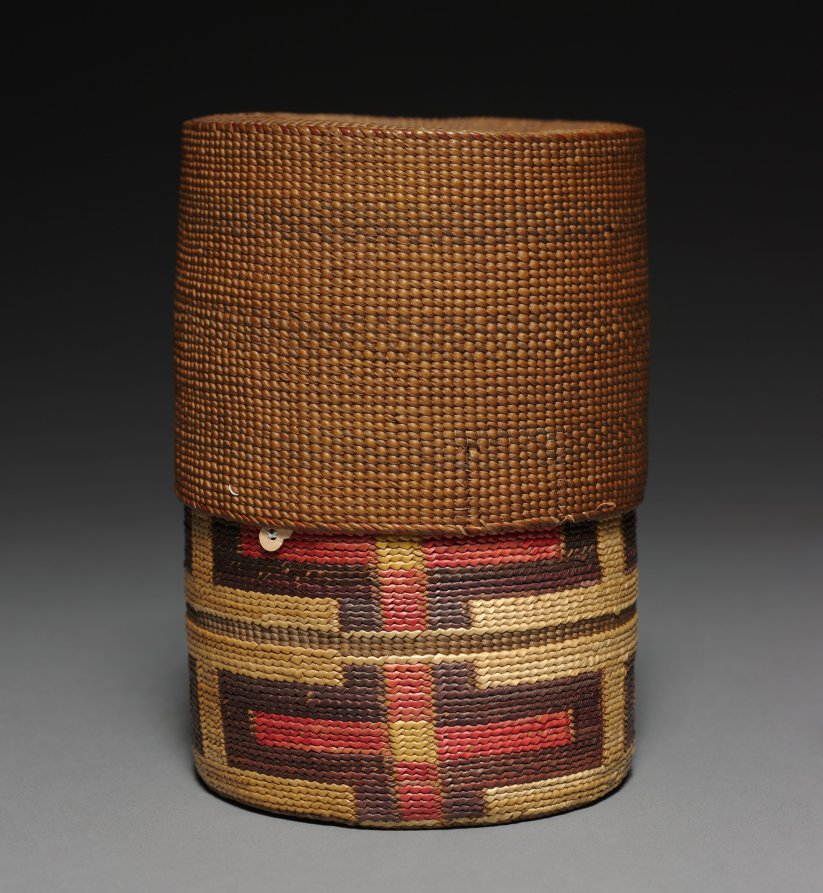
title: Telescoping basket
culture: Northwest Coast, Tlingit, 19th century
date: 1800's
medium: twined spruce root with grass false embroidery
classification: Basketry